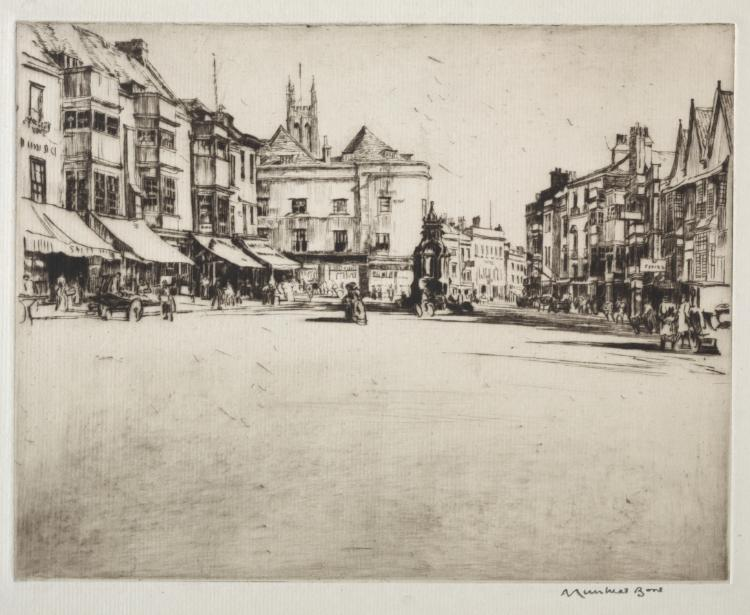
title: The Market Place, Wells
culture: England, 20th century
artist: Muirhead Bone (British, 1876–1953)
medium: drypoint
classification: Print